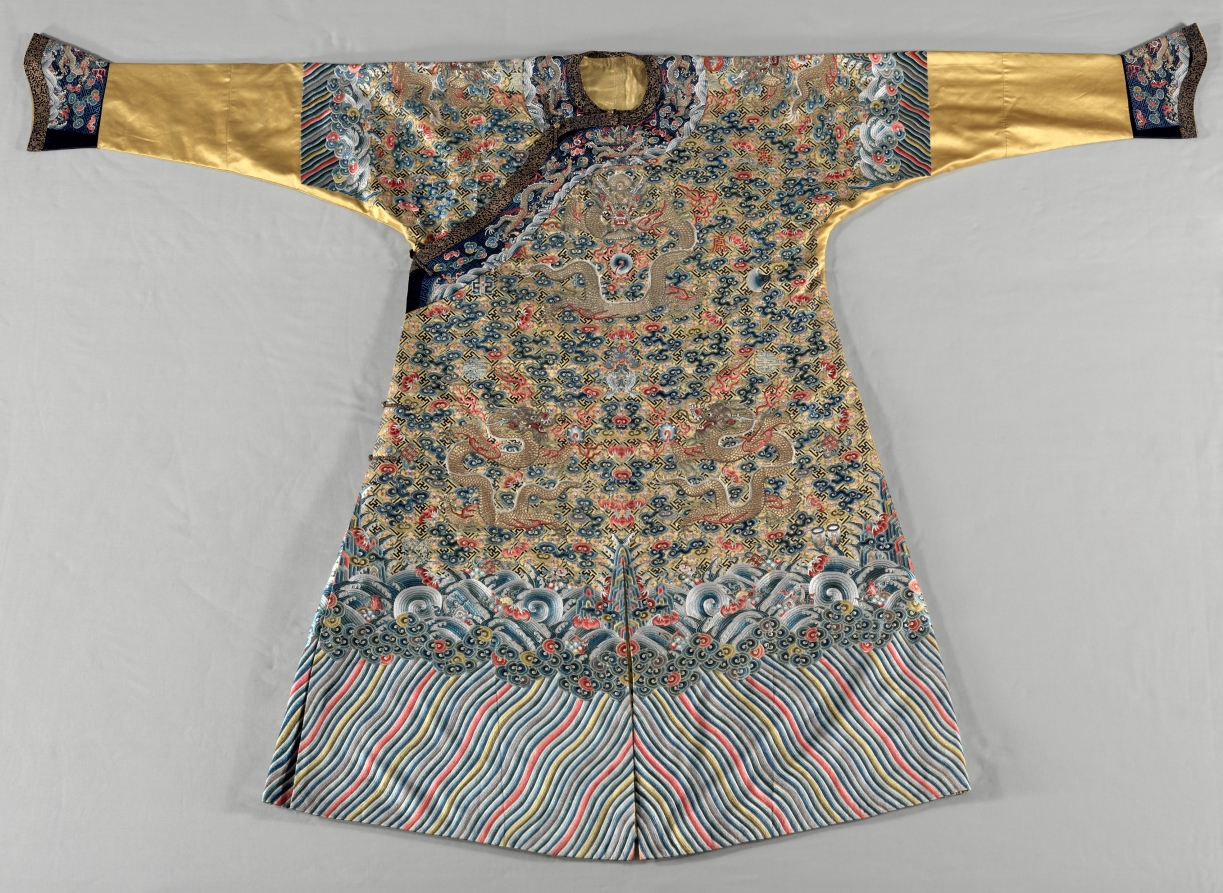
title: Semi-formal Court Robe (Jifu)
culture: China, Qing dynasty (1644–1911), Jiaqing period (1796–1820)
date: late 1700s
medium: Silk: satin weave; silk and metal thread: embroidery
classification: Garment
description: The lavishly embroidered motifs of dragons, clouds, waves, and rocks on this robe form a diagram that symbolizes the universe: the lower horizontal band of waves at the hem represents the oceans that surround the earth, while the prism-shaped rocks emerging from the waves at the sides, front, and back of the coat symbolize the earth. The cloud-filled firmament above the waves shows dragons—symbols of imperial authority. During the Qing dynasty, yellow indicated “imperial” and the color’s use in garments was reserved for the emperor and his consorts. The emperor would have worn this type of court robe at semi-official meetings at court but not when he performed the official state rituals.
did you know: Look for the red bats embroidered throughout the robe. They are lucky symbols, because the words for “bat” and for “luck” are homophones, both pronounced “fu."